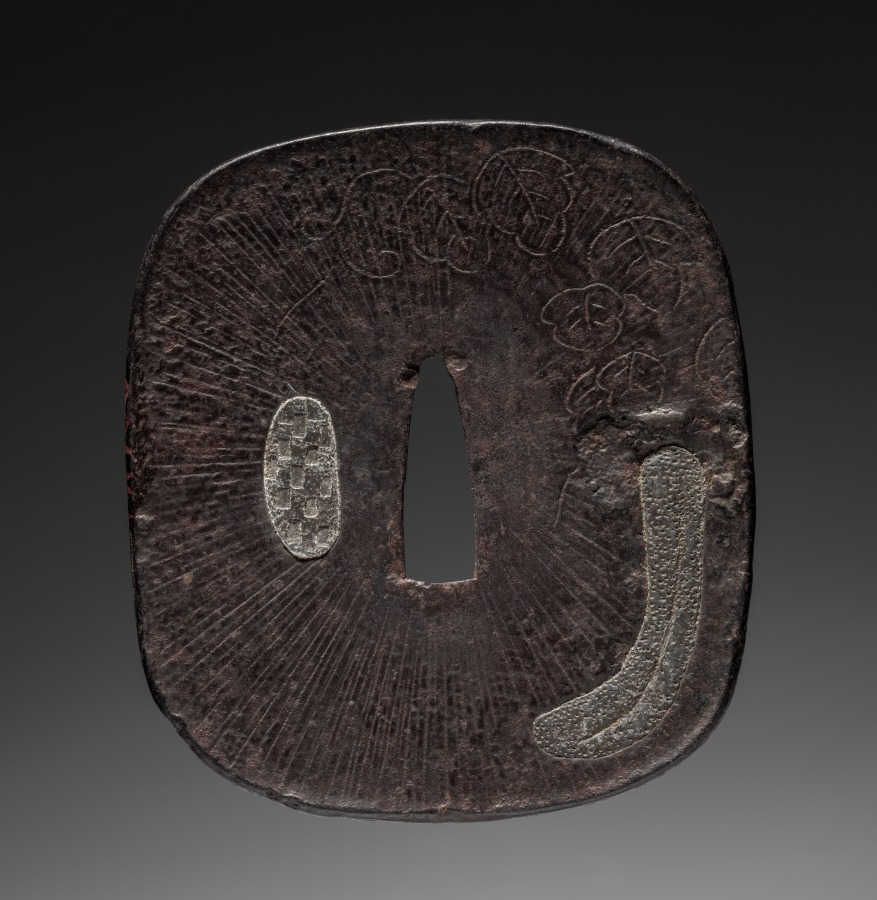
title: Sword Guard (Tsuba) with Snail and Gourd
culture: Japan, possibly Edo period (1615-1868)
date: c. 1615–1868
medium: iron with lead inlay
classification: Arms and Armor